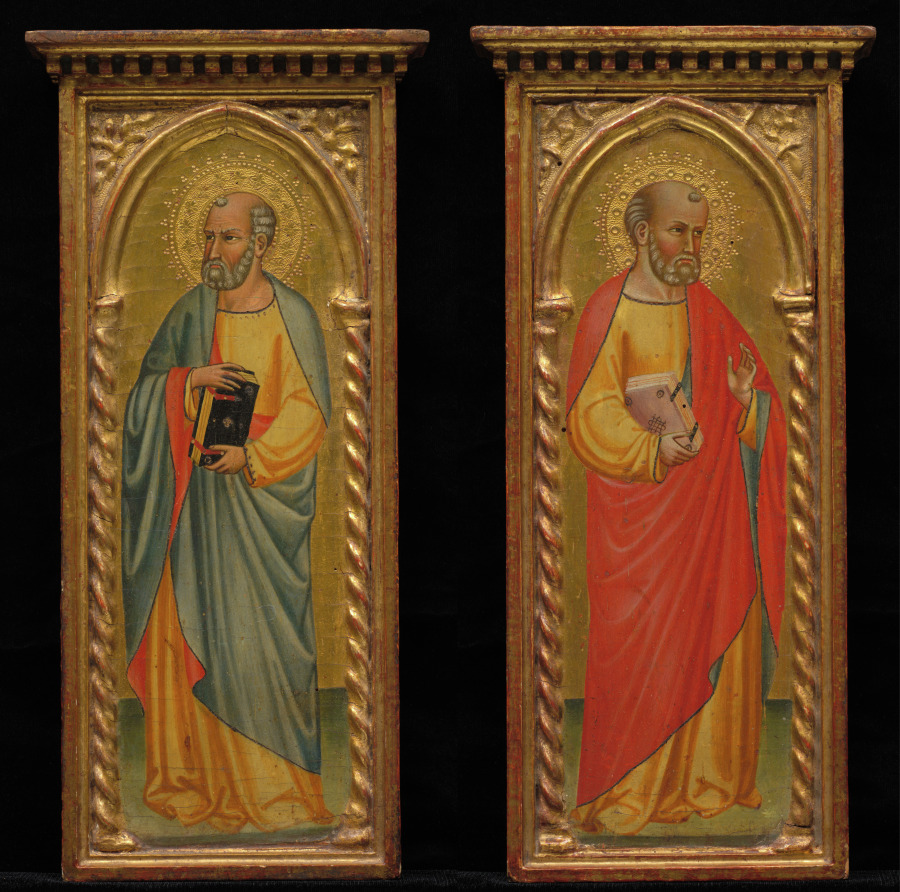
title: Standing Saint and Saint in Red Cloak (pair)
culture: Italy, late 19th-early 20th century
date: late 19th - early 20th century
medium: tempera on panel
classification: Painting